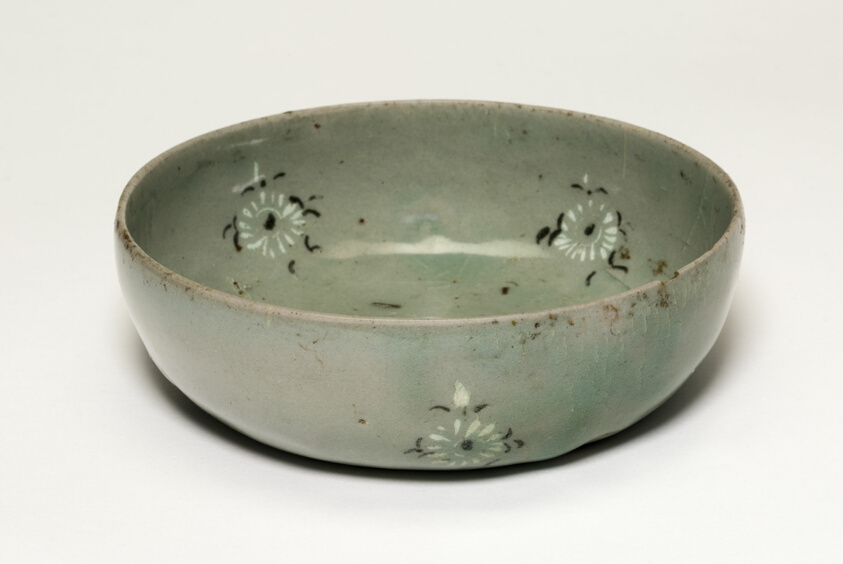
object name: Vessel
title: Monk’s Bowl with Chrysanthemum Motif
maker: Korea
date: Goryeo dynasty (918–1392), 12th century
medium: Stoneware with red and white slip and celadon glaze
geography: Korea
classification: ceramics; asian art